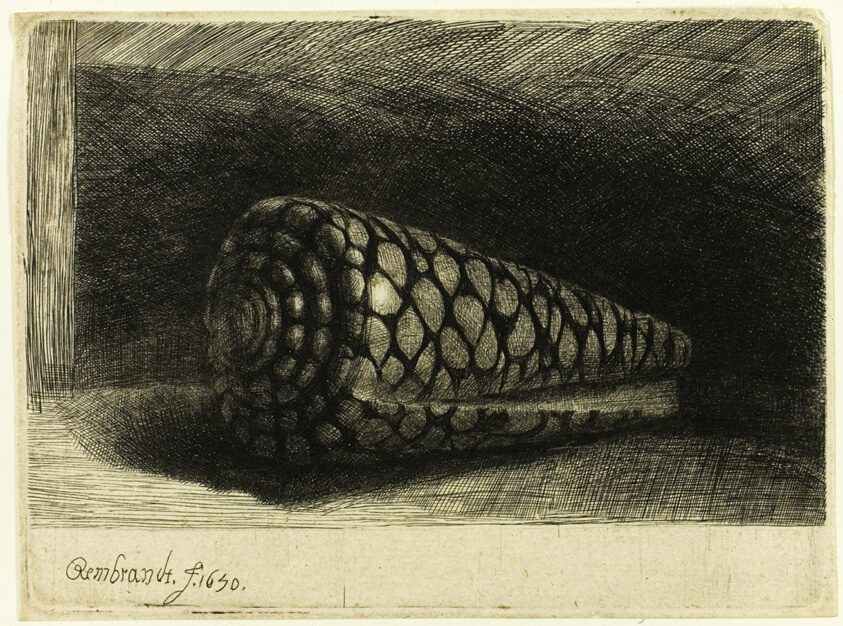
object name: Print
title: The Shell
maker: Rembrandt van Rijn (Dutch, 1606-1669)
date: 1650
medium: Etching on ivory laid paper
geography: Holland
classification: etching; print; prints and drawing; paper